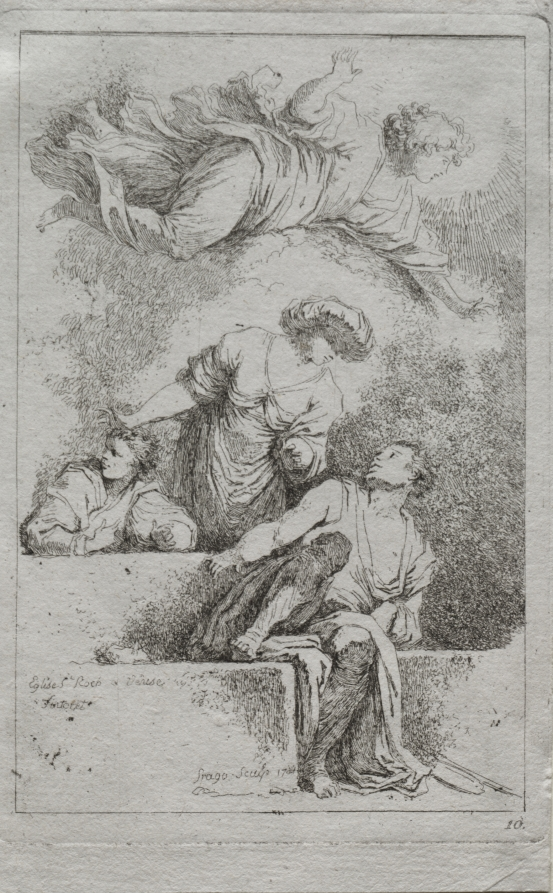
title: The Disciples at the Tomb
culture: France, 18th century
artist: Jean-Honoré Fragonard (French, 1732–1806)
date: 1764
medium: etching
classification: Print